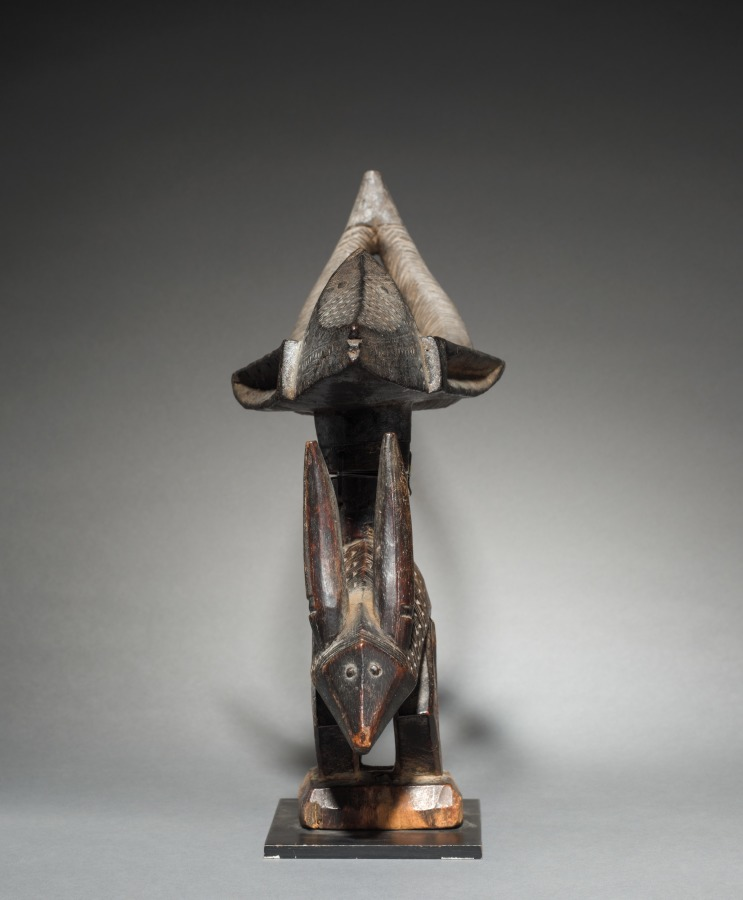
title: Double-Headed Headdress (N'gonzon Koun)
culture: Africa, West Africa, Mali, Bamana-style blacksmith-carver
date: 1900s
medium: Wood and iron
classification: Mask